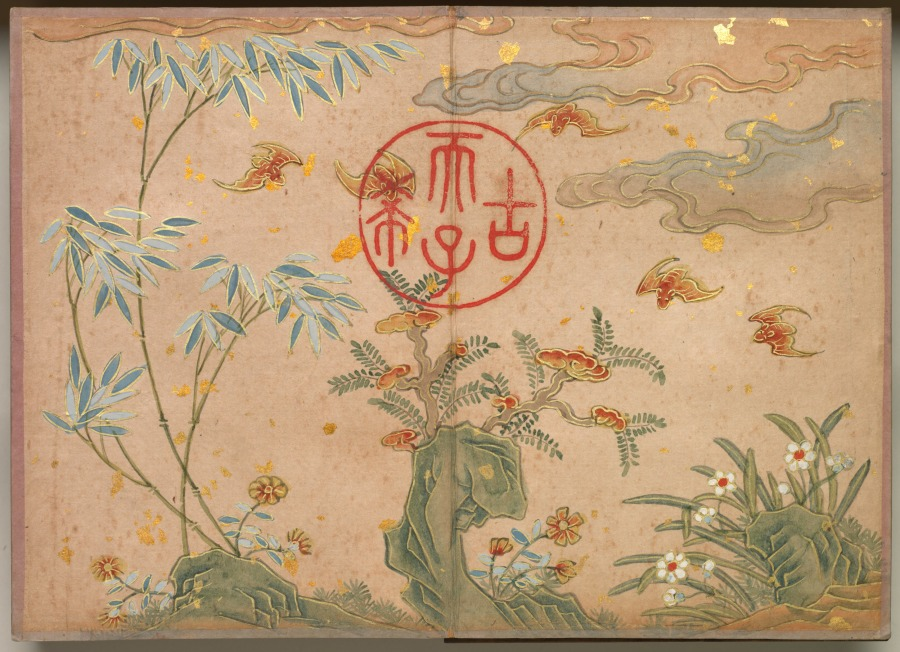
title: Desk Album: Flower and Bird Paintings (Bats, rocks, flowers circular calligraphy)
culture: China, Qing dynasty (1644-1911)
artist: Zhang Ruoai (Chinese, 1713–1746)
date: 1700s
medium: album leaf, ink and color on paper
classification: Painting